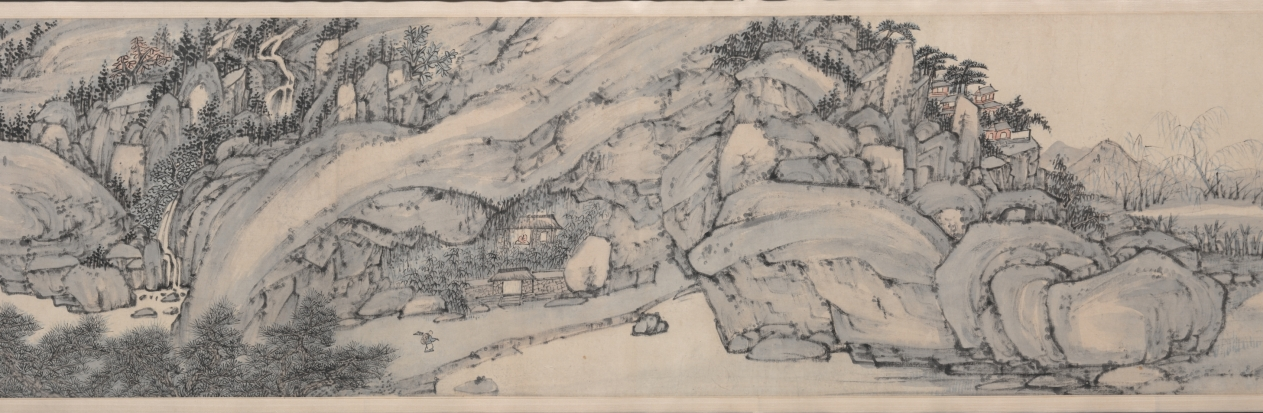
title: Pure Tones among Hills and Waters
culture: China, Qing dynasty (1644-1911)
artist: Xiao Yuncong (Chinese, 1596–1673)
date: 1664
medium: Handscroll; ink and light color on paper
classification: Painting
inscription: 種松發秀色，具是高人心。/ 鑿石築茅屋，長年覆綠陰。/ 白雲無意出，舒卷趨空林。/ 萬籟時一寂，微風墮清音。/ 此情莫可擬，此景誰能論。/ 只向千峰裏，共彈五絃琴。/ 桃花依綠水，不覺又春深。 甲辰花朝題于青蓮閣, 鐘山老人蕭雲從。[印] 鐘山老人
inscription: Title and inscription, dated 1744, and 3 seals of Shen Feng 沈鳳 (1685-1755).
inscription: 4 colophons and 24 additional seals: 1 colophon, dated 1811, and 5 seals of Xiang Yuan 項源 (active about 1811); 1 colophon, dated 1858, and 2 seals of Qi Junzao 祁寯藻 (1793-1866); 1 colophon and 4 seals of Zhang Yunzhong 張允中 (1881–1960?); 4 seals of Jiang Xun 江恂 (active about 1753–after 1780); 1 colophon dated 1943, and 2 seals of Wang Shaoming 汪兆銘 (Wang Jingwei 汪精衛, 1883–1944); 1 seal of Qi Zhiliu 祁之鏐 (active about 1858); 2 seals of Yu Zhimeng 俞芷盟 (second half of 19th century); 4 seals unidentified.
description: Painted at age 68, this landscape is one of Xiao Yuncong’s most mature works. Extraordinary in its combination of fine details with bold brushstrokes and bluish washes, it is also one of his longest compositions in handscroll format, extending over 23 feet. Throughout his lifetime, Xiao visited Nanjing and Yangzhou, where he met with other painters and literati. Regarded as the founder of the Gushu school (姑孰派) of painting, Xiao painted from nature, and his landscapes are informed by his travels, as well as by his experience as a print designer.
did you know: Biographical notes on Xiao Yuncong relate that he did not pursue the career of an official, but "furnished a cottage in the eastern suburbs [of Wuhu in Anhui province] and amused himself playing the qin (zither) and reading every day."